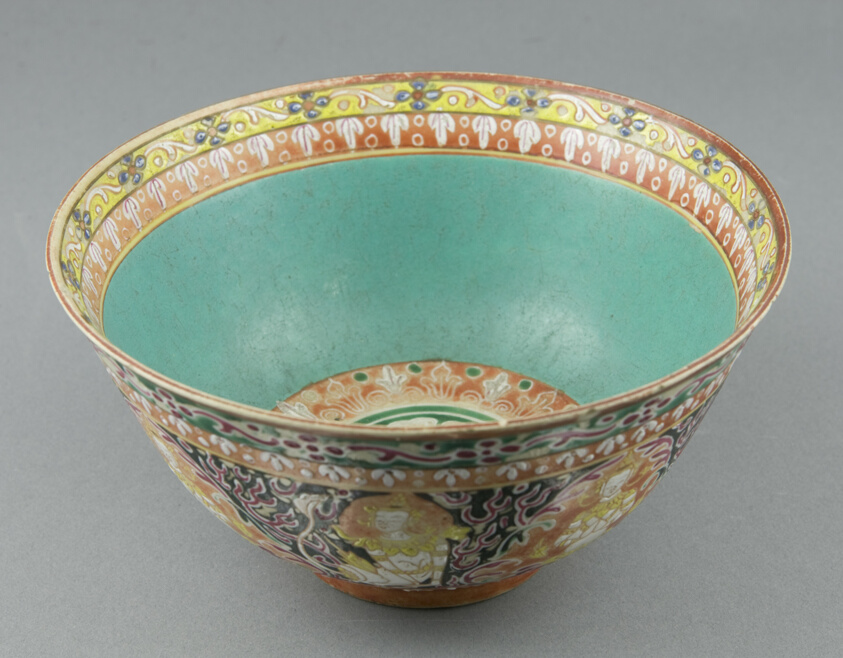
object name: Vessel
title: Bencharong (Five-Colored) Ware, Bowl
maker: China, for the Thai Market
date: 19th century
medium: Porcelain painted in overglaze polychrome enamels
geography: China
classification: porcelain; asian art; ceramics; vessel